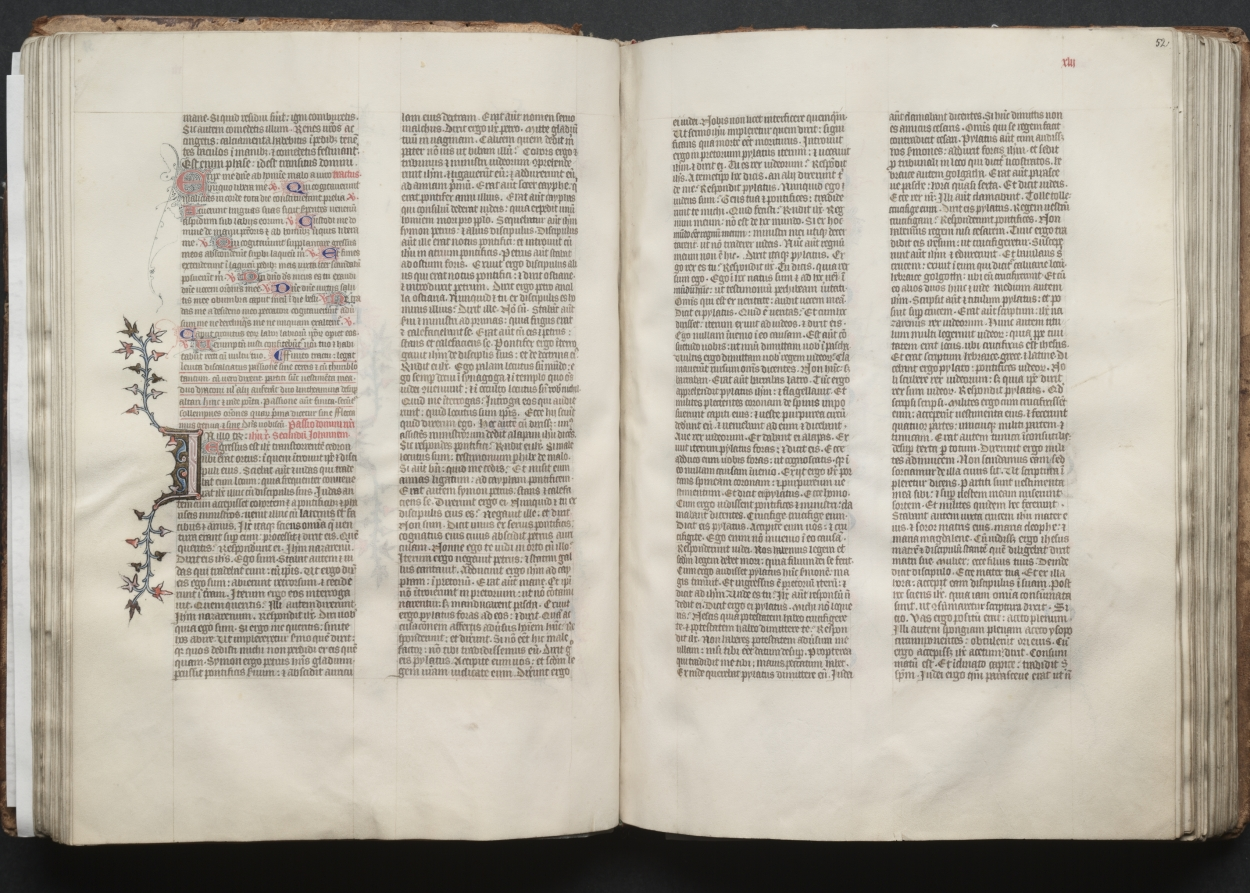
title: The Gotha Missal: Fol. 51v, Text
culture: France, Paris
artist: Master of the Boqueteaux (French)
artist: and Workshop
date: c. 1375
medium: ink, tempera, and gold on vellum; blind-tooled leather binding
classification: Bound Volume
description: The style and quality of this manuscript's decoration is typical of deluxe Parisian books made for aristocratic or royal patrons. Most of the book's decoration appears to be the work of the Master of the Boqueteaux, an artist active at the court of King Charles V (died 1380). His style was apparently shared by a number of book illuminators working in and around Paris. It is very possible that the Gotha Missal belonged to Charles V, but is not provable because the manuscript has no royal portraits and lacks a colophon. Given the book's magnificent decoration, however, it would seem that it was produced for a Valois prince, if not for the king himself. The manuscript receives its name from the German dukes of Gotha, its later owners.